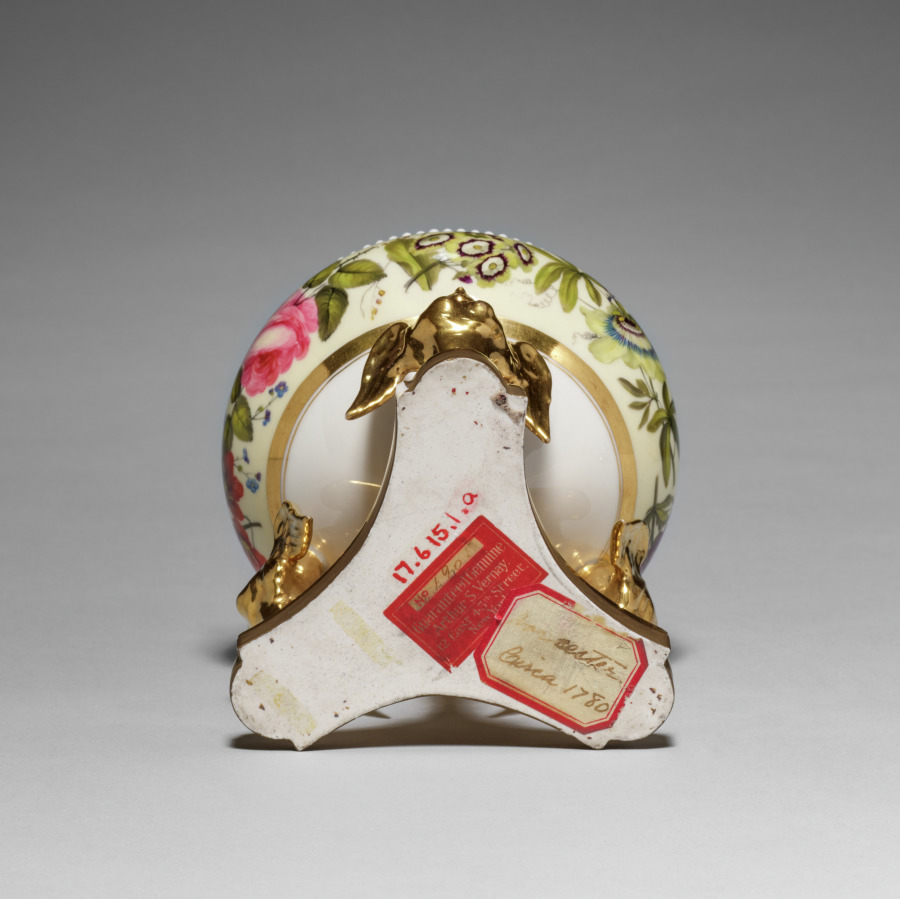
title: Urn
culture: England, Worcester, 19th century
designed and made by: Flight, Barr and Barr (British)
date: c. 1815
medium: artificial porcelain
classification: Ceramic